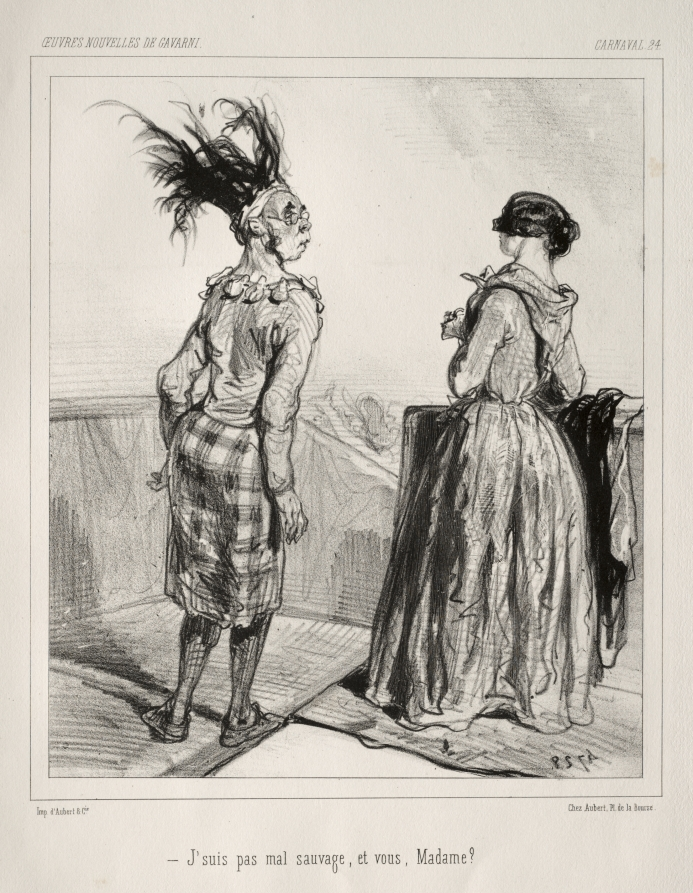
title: Carnaval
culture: France, 19th century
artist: Paul Gavarni (French, 1804–1866)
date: c. 1841–47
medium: lithograph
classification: Print